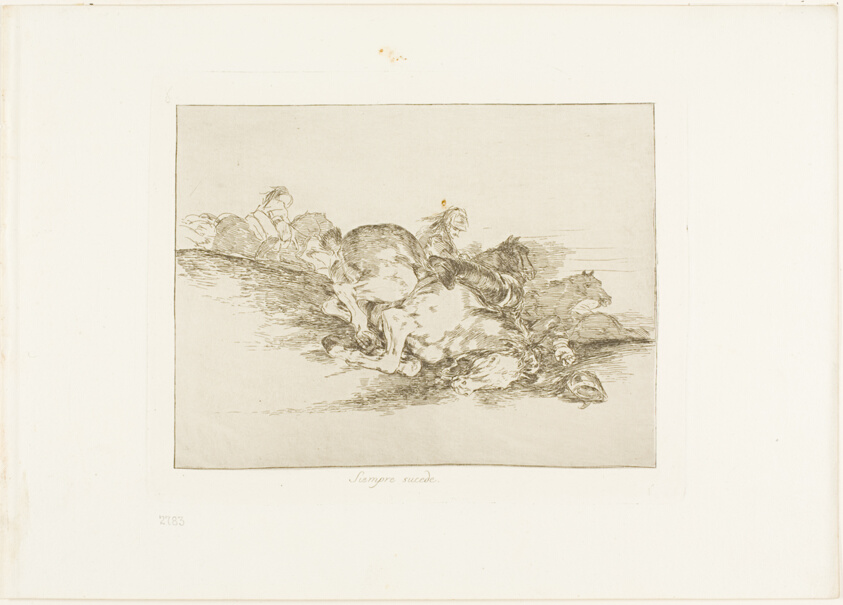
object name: Print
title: It Always Happens, plate eight from The Disasters of War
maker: Francisco José de Goya y Lucientes (Spanish, 1746-1828)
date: 1814/20, published 1863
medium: Etching and drypoint on ivory wove paper with gilt edges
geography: Spain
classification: etching; print; prints and drawing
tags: war